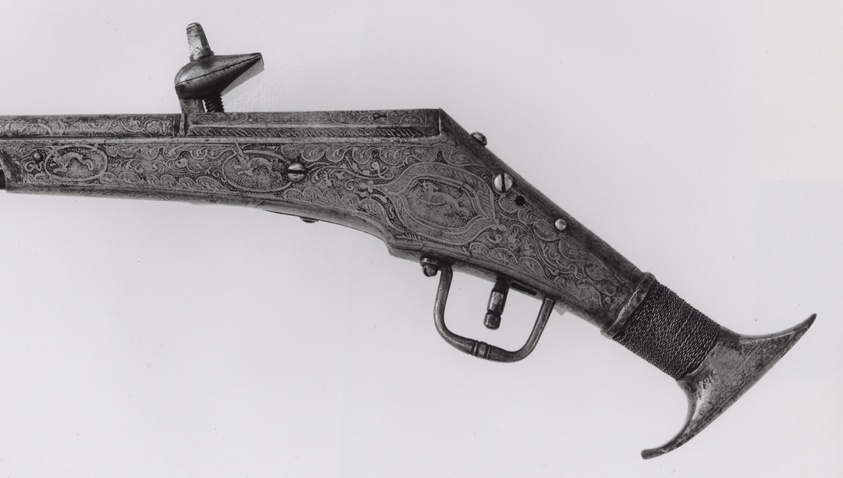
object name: Arms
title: Wheellock Pistol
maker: Barrel smith: Peter Danner; (German, active 1582–1602) Nuremberg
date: c. 1590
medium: Steel, iron, gilding, and brass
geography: Nuremberg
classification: firearm-handgun; arms; arms and armor